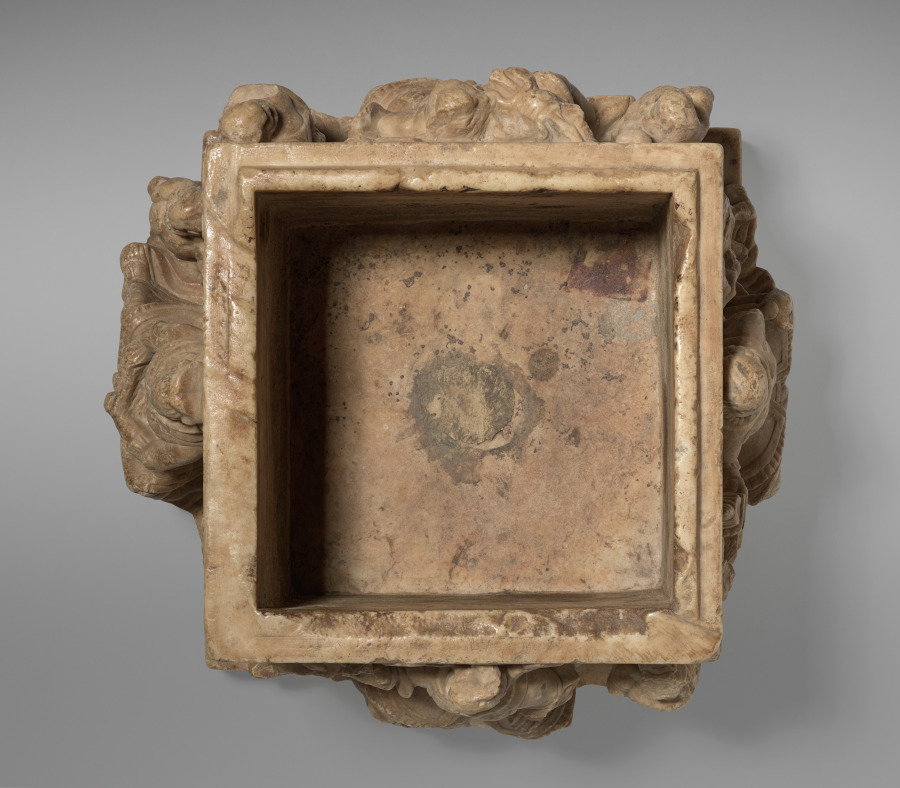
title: Square Urn with Celestial Guardians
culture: China, Tang dynasty (618–907)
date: 700s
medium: marble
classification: Sculpture